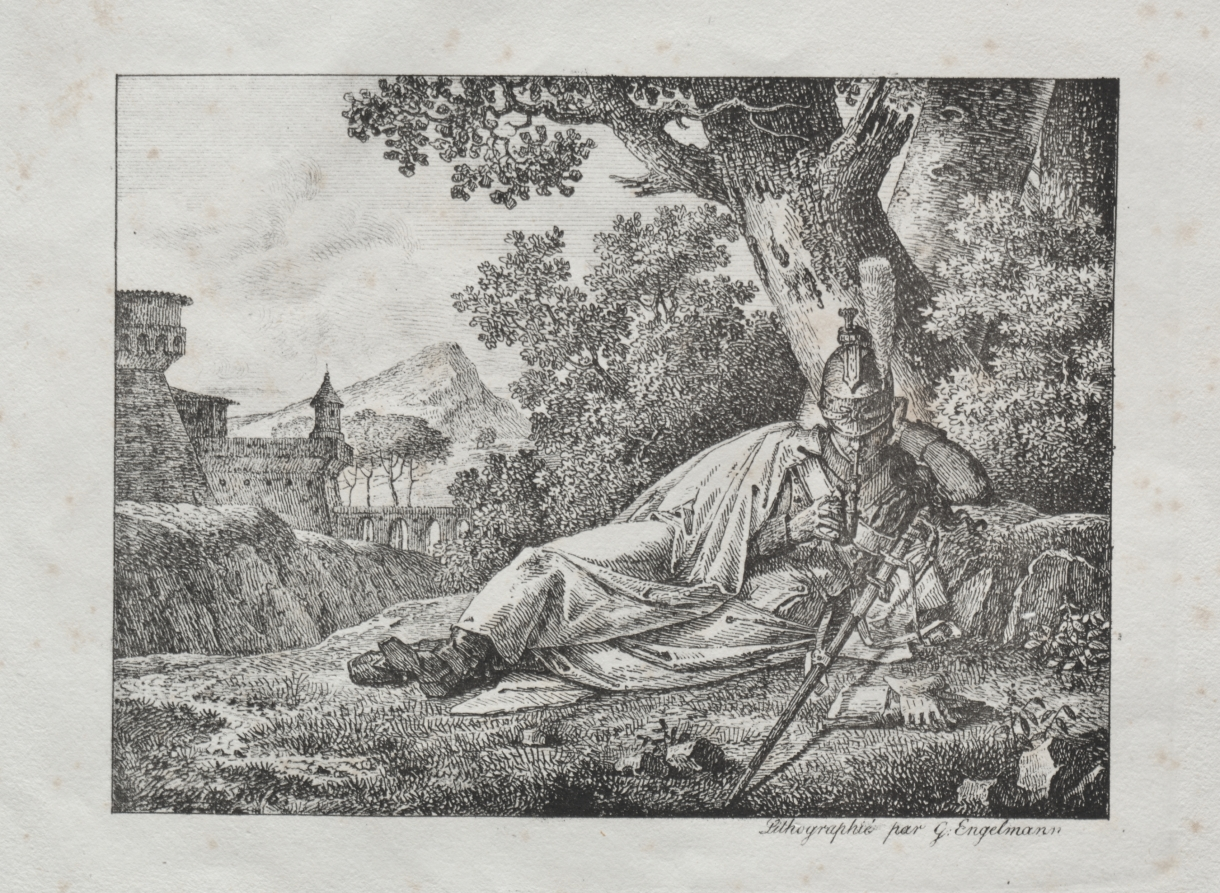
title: Receuil d'essais lithographiques: Dragon fumant couche au pied d'un arbre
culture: France, 19th century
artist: Antoine Pierre Mongin (French, 1761–1827)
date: 1822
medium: lithograph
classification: Bound Volume